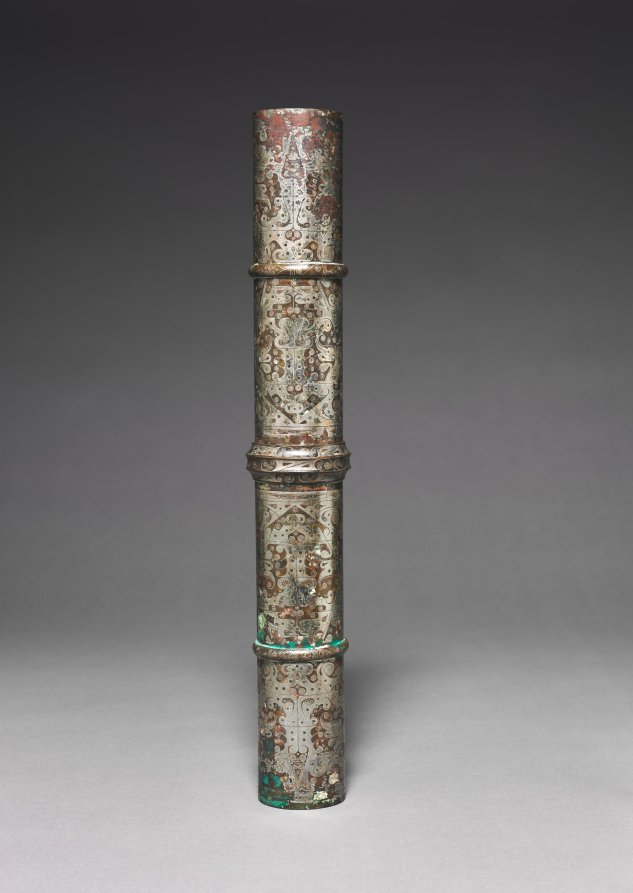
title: Chariot Canopy Shaft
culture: China, Western Han dynasty (206 BCE–8 CE)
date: 202 BCE–9 CE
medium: bronze inlaid with silver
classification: Metalwork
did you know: This bronze object decorated with inlaid silver was part of the structure that held a canopy aloft on a chariot.